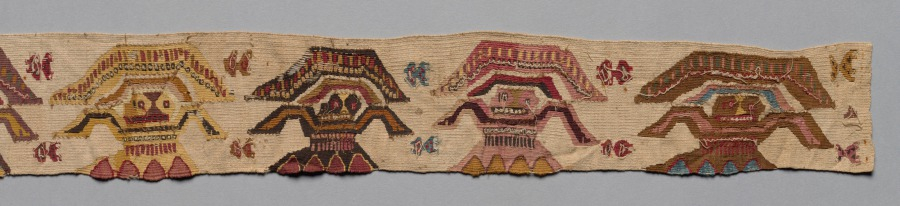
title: Lower Border of a Garment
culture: Central Andes, North Coast, Chimú or Lambayeque (Sican) People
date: 1000–1470s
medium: tapestry; wool and cotton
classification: Textile